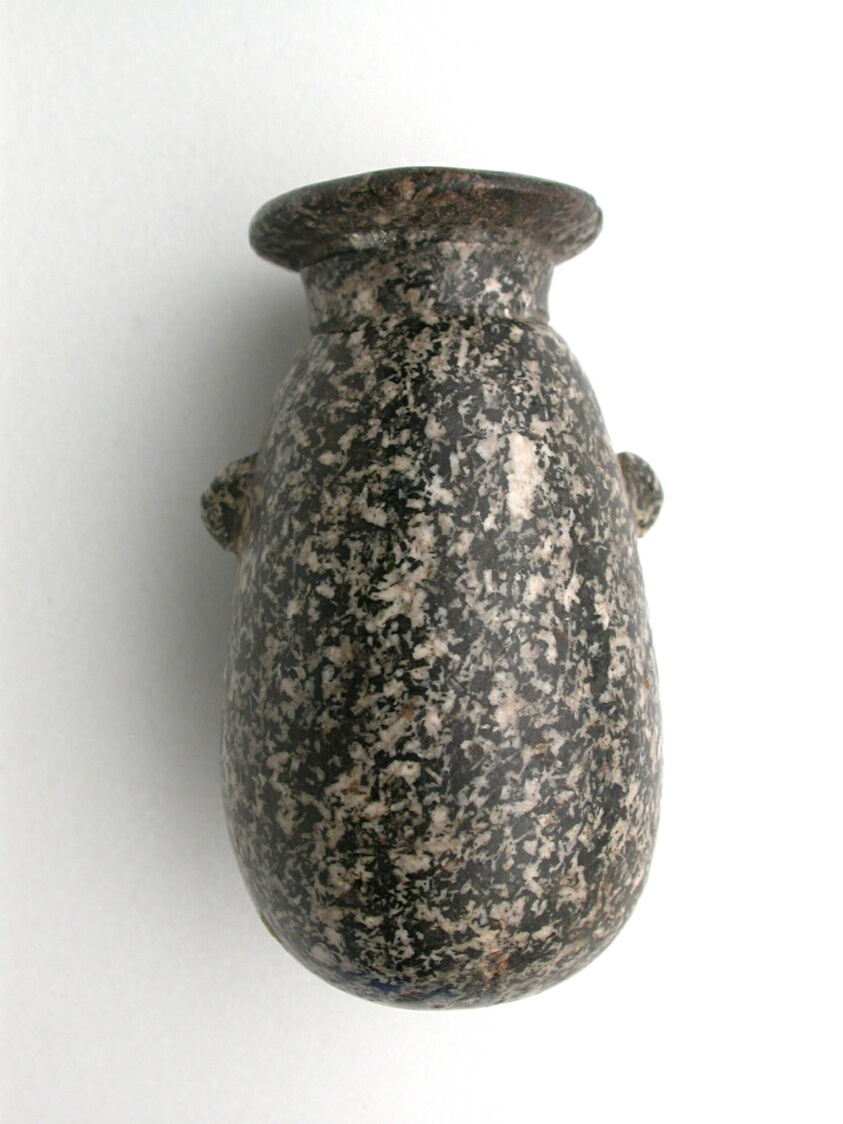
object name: Vessel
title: Alabastron (Container for Scented Oil)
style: egyptian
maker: Egyptian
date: Late Period, Dynasty 26–30 (664–343 BCE) (?)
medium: Granite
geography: Egypt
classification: alabastron; stone; vessel; ancient art